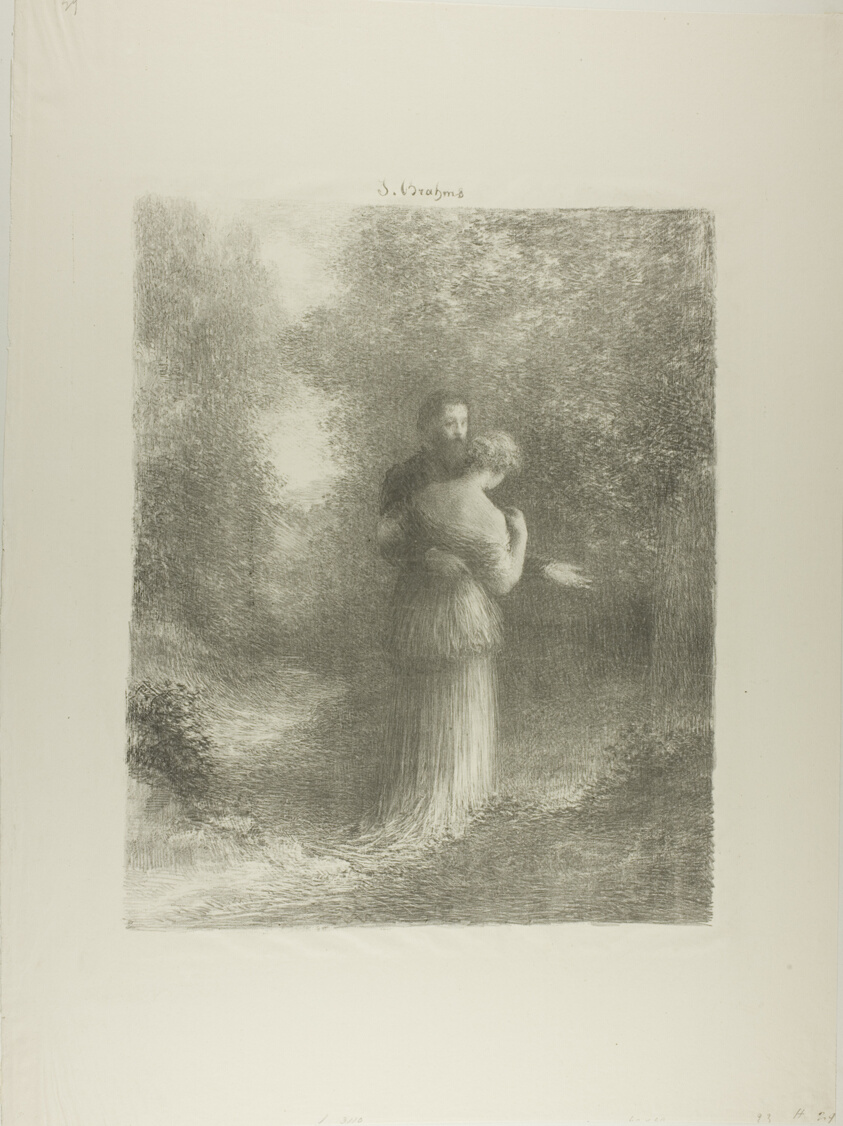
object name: Print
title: Love Poems, first plate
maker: Henri Fantin-Latour (French, 1836-1904)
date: 1880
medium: Lithograph in gray on ivory laid paper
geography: France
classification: lithograph; print; prints and drawing